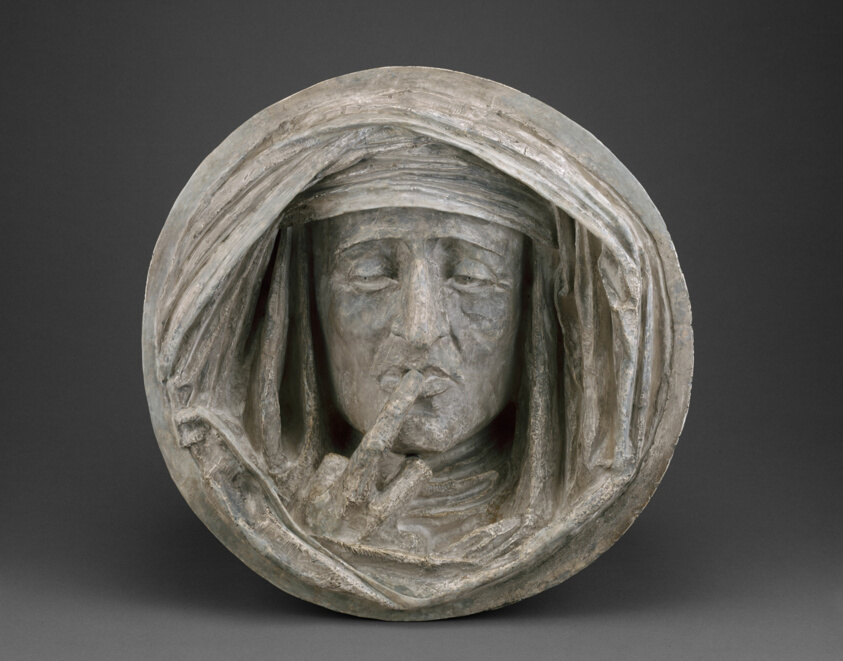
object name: Sculpture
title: Silence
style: nineteenth century, 19th century, romantic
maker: Auguste Préault (French, 1809–1879)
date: 1842–43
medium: Plaster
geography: France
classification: relief; sculpture; french; plaster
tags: funerary art, death, figure, funerals, hands, head